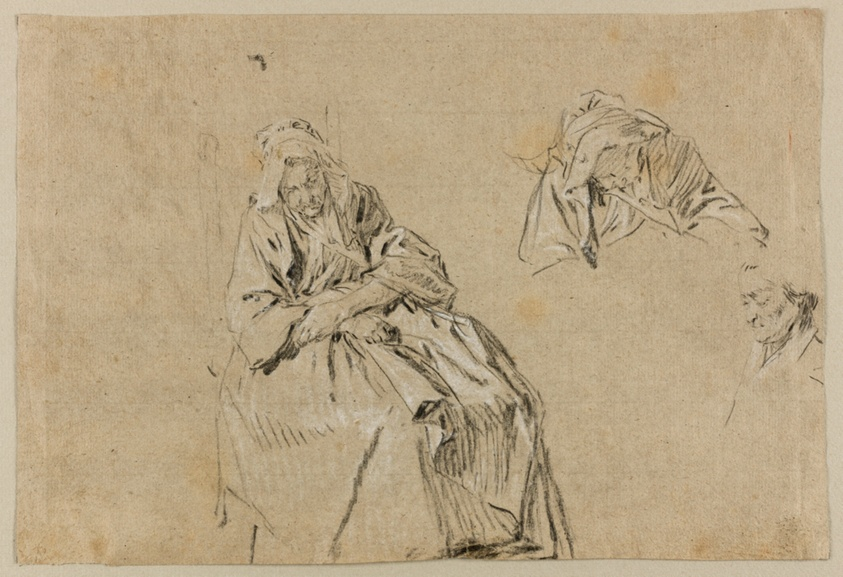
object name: Drawing and Watercolor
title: Study for Old Age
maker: Nicolas Lancret (French, 1690-1743)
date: c. 1732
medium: Black and white chalk on brown laid paper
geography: France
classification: chalk; drawings (visual works); prints and drawing